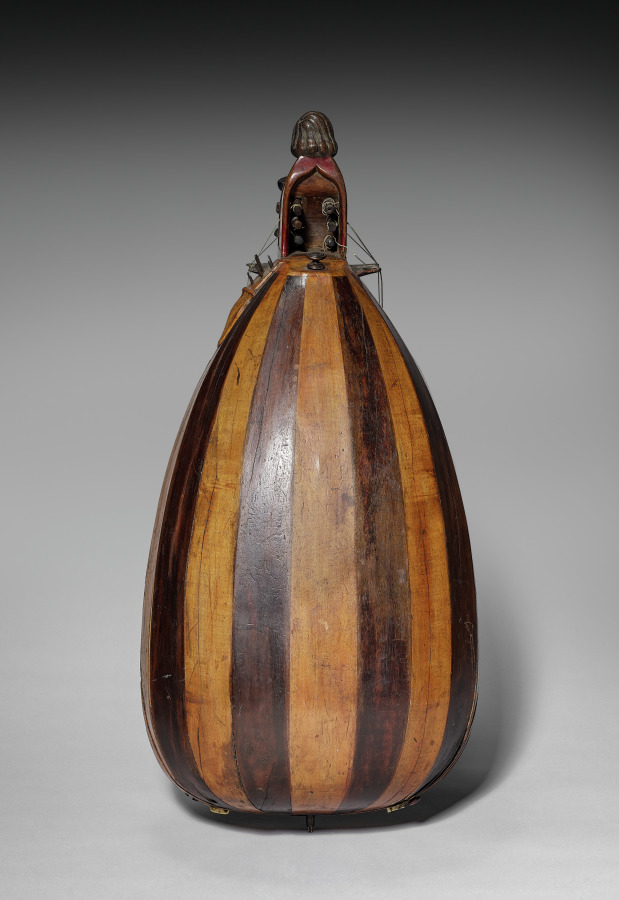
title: Vielle à roue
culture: France, 18th century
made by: Pajot of Jánzat (French)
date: 1700s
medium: wood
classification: Musical Instrument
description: The instrumentalist could play melodies on the keyboard that presses tangents against one or more strings. Often there are also multiple drone strings, which give a constant pitch accompaniment to the melody, resulting in a sound similar to that of bagpipes. This type of instrument is depicted in several artworks in the CMA collection: 1924.656, 2008.34.2, 1960.20. The vielle à roue is also related to the Swedish nyckelharpa, which was featured on the CMA performing arts series in 2017 played by Emilia Amper.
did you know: Also known as a “hurdy-gurdy” or “wheel fiddle,” this instrument produces sound by a hand crank-turned rosined wheel rubbing against the strings.